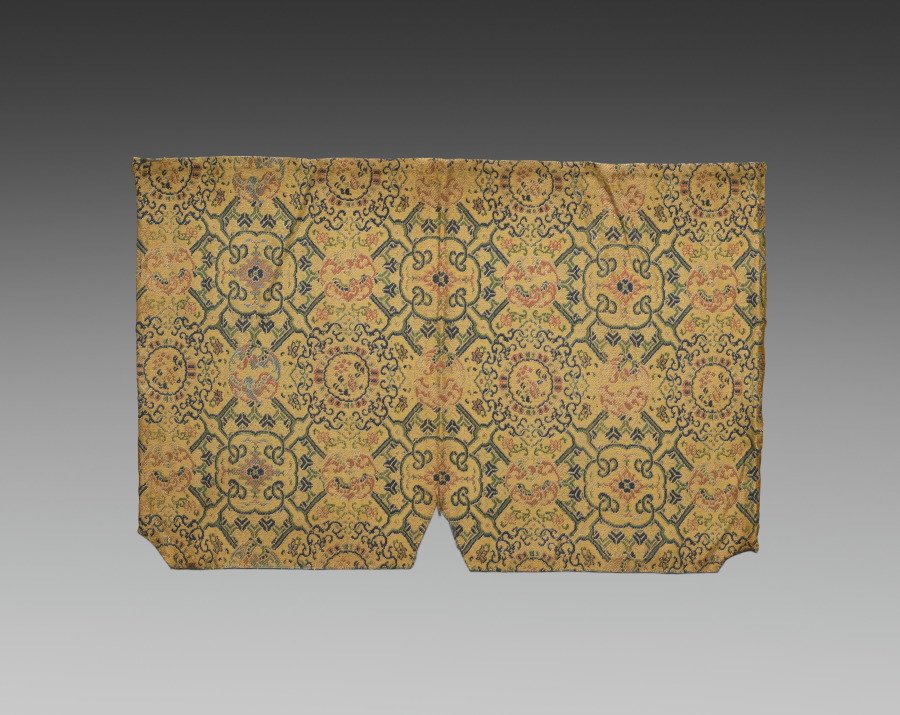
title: Fragment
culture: China, Qing dynasty (1644-1911)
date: 1800s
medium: silk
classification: Textile